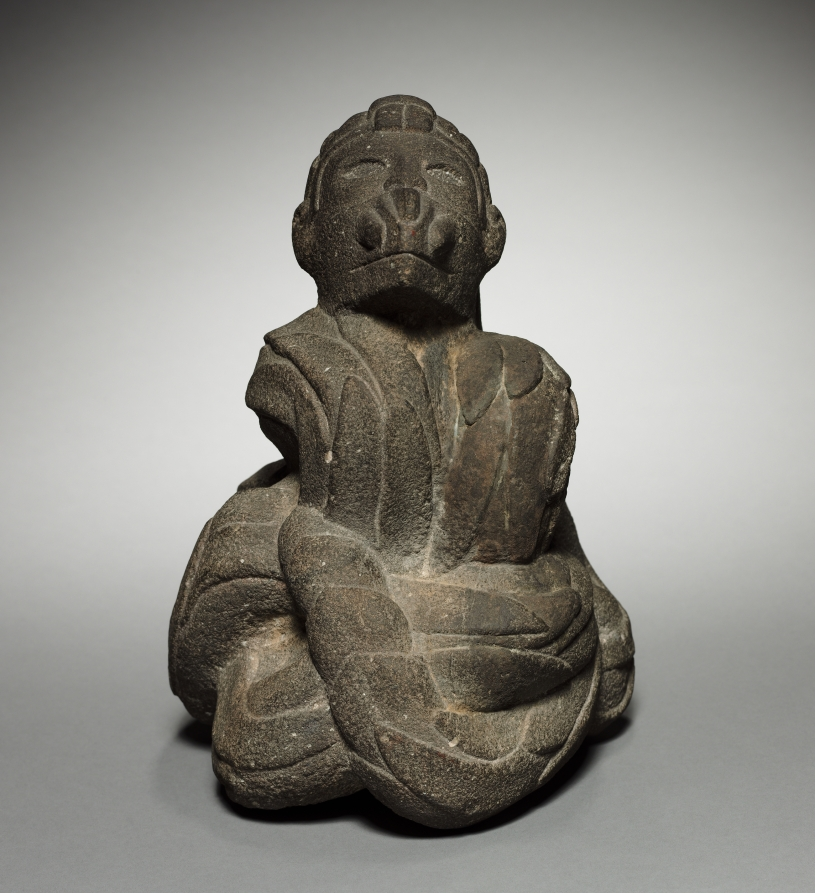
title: Feathered Serpent (Quetzalcoatl)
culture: Central Mexico, Aztec or modern, Post-Classic Period or modern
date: 1325–1521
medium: stone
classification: Stone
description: The museum bought this sculpture in 1941, when study of ancient American arts was in its infancy. It has many odd features, a few perhaps revealing an attempt to make the subject—the Aztec deity Quetzalcoatl (Feathered Serpent)—palatable to modern viewers. But it cannot absolutely be declared fake because some real Aztec sculptures are unusual. Analysis of the surface so far provides no help. Especially odd is the arrangement of the coils into bulges that suggest the pectorals, knees, and buttocks of a human body, as though the sculpture represents a human in a serpent costume. Real Aztec sculpture usually portrays the serpent's dangerous body more realistically. Also, the mouth mask—the insignia of a wind deity related to Quetzalcoatl and, thus, perhaps appropriate—is much larger in genuine sculptures. This suggests that, because the mask and its authentic proportion are strange to our eyes, a forger scaled it down. Other uncommon features include the incomplete carving of the ears, the fact that the human head does not emerge from a serpent's mouth, and more.